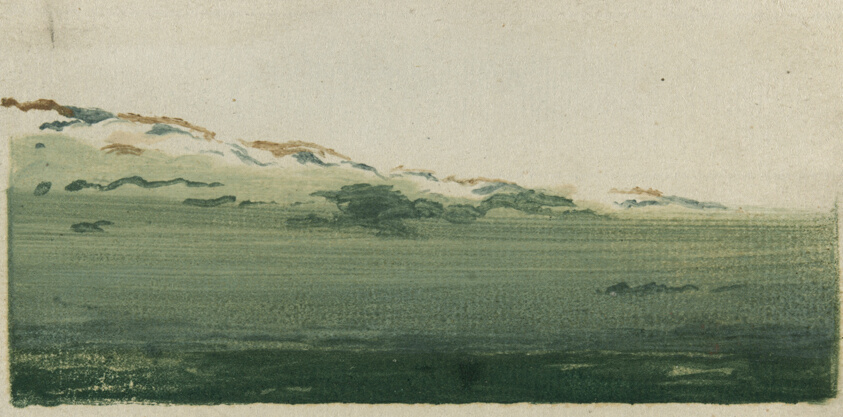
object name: Print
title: The Sea at Bognor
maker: Theodore Roussel (French, worked in England, 1847-1926)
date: 1895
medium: Color monotype on ivory laid paper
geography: France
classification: print; prints and drawing